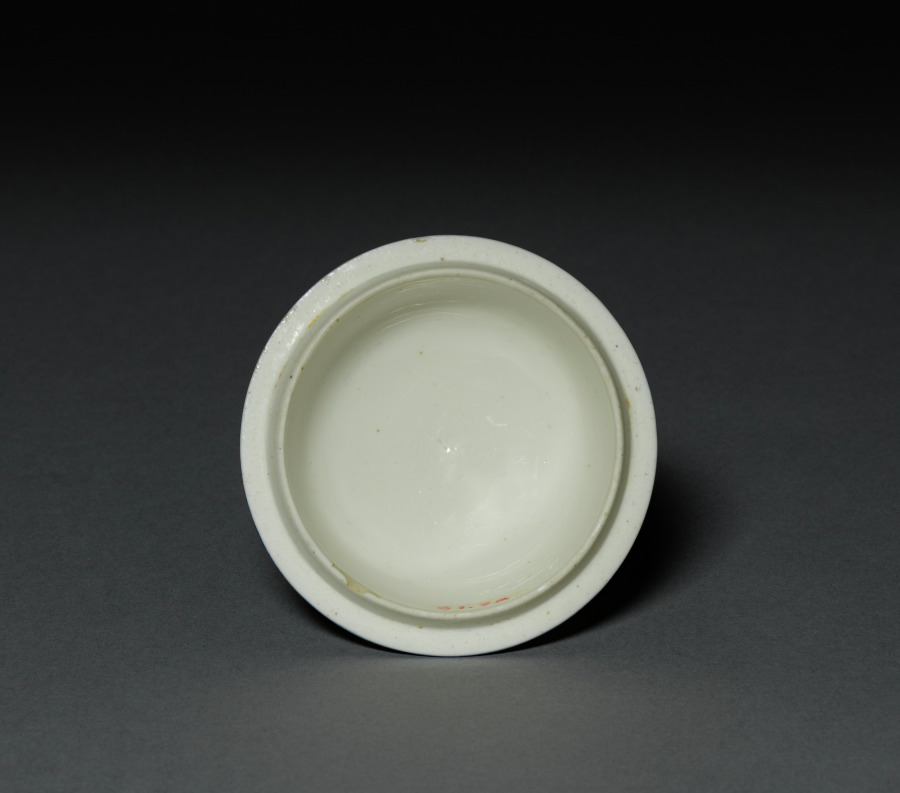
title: Cover for a Broth Bowl (Écuelle ronde)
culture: France, Mennecy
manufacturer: Mennecy- Villeroy Factory (French)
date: c. 1755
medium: soft-paste porcelain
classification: Ceramic